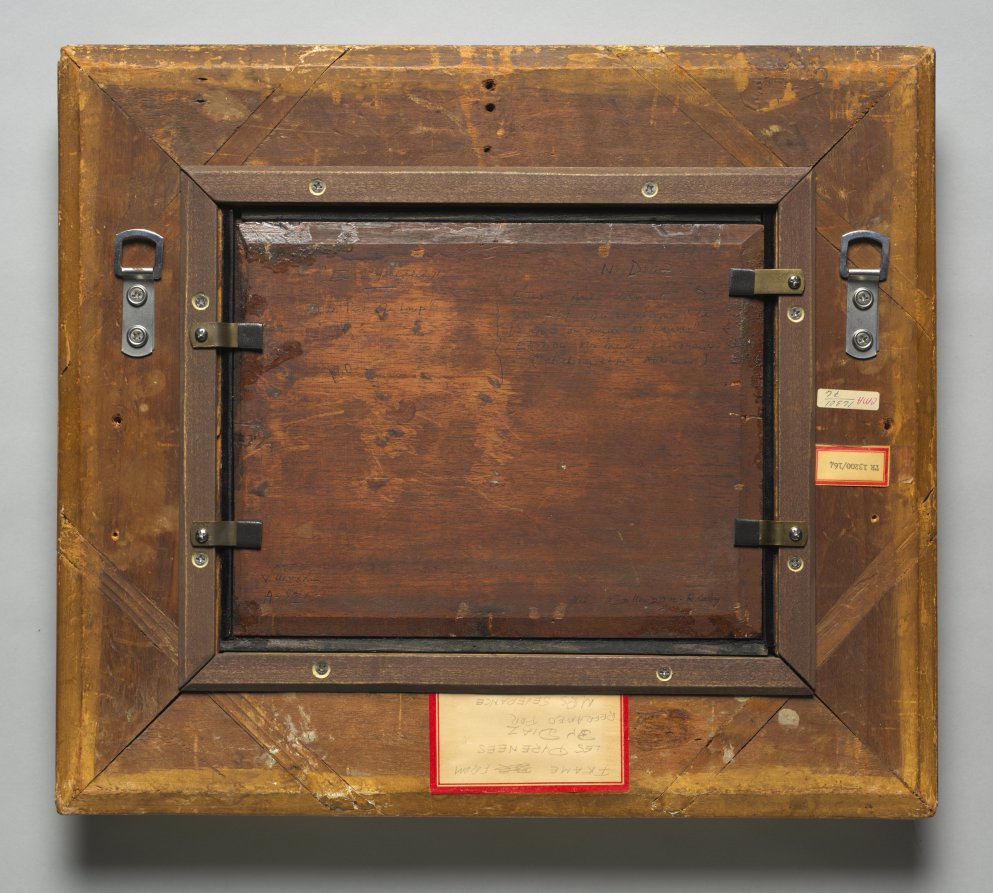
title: The Pyrenees, the Peak of the Midi de Bigorre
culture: France, 19th century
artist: Narcisse Diaz de la Peña (French, 1807–1876)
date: 1871–1872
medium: oil on wood panel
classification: Painting